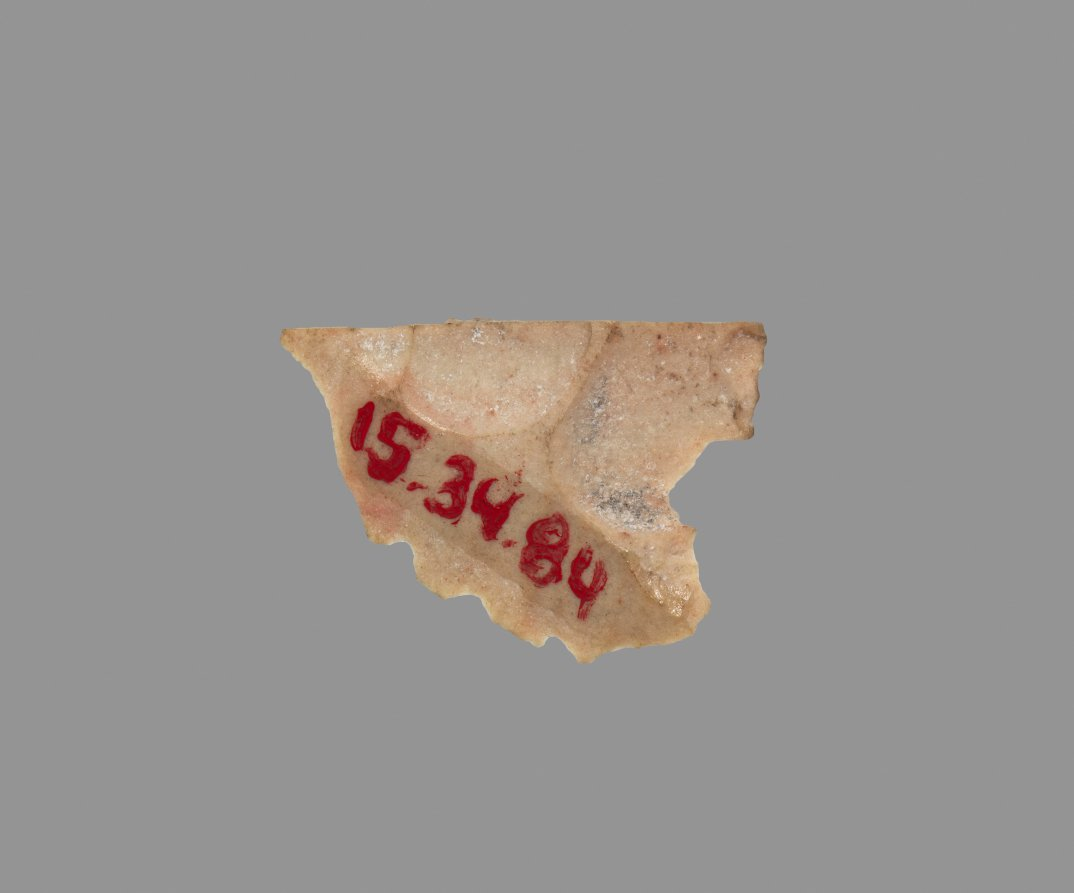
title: Sickle Blade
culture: Egypt, Middle Kingdom (2040–1648 BCE), Dynasty 12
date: 1980–1801 BCE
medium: flint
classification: Implements